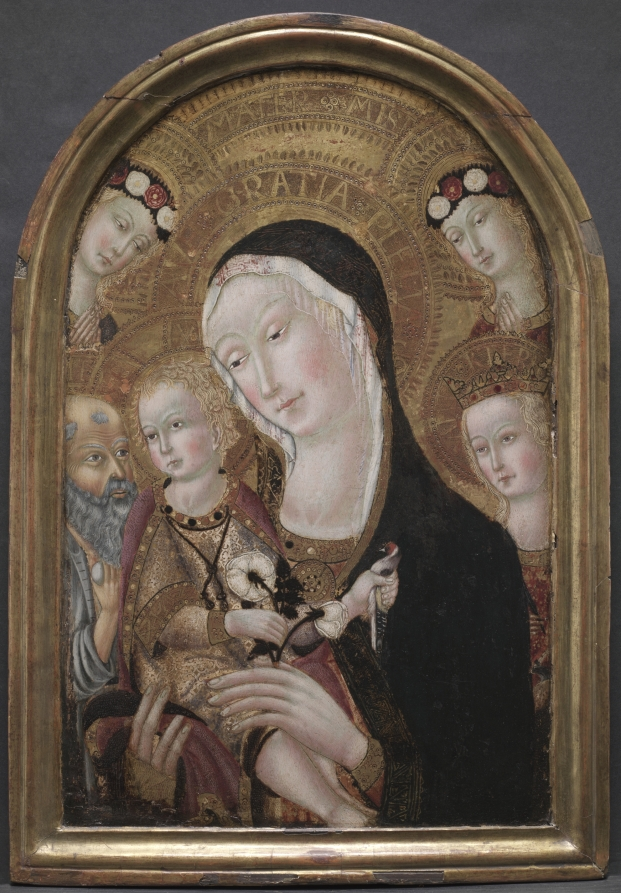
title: Virgin and Child with Saint Jerome and Saint Catherine of Alexandria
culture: Italy, Siena(?)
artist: Carolino da Viterbo (Italian)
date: c. 1450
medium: tempera and gold on wood panel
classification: Painting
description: In his right hand, the Christ child grasps a stem of roses. The beauty and fragrance of roses symbolize heaven, while their thorny stems allude to the crown of thorns and Christ's suffering. The bird he holds in his left hand symbolizes the human soul. The elaborate haloes with Latin inscriptions identify the figures and help organize the composition. The names of Christ, Saint Jerome, and Saint Catherine of Alexandria appear in abbreviated form. The Madonna's halo proclaims her worthiness to bear the Son of God: "Hail, full of grace," while the inscription at the top is one of her most popular titles: "Merciful Mother."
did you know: The figure to the right of the Christ child is Saint Jerome, identifiable by the rock he holds to his chest.